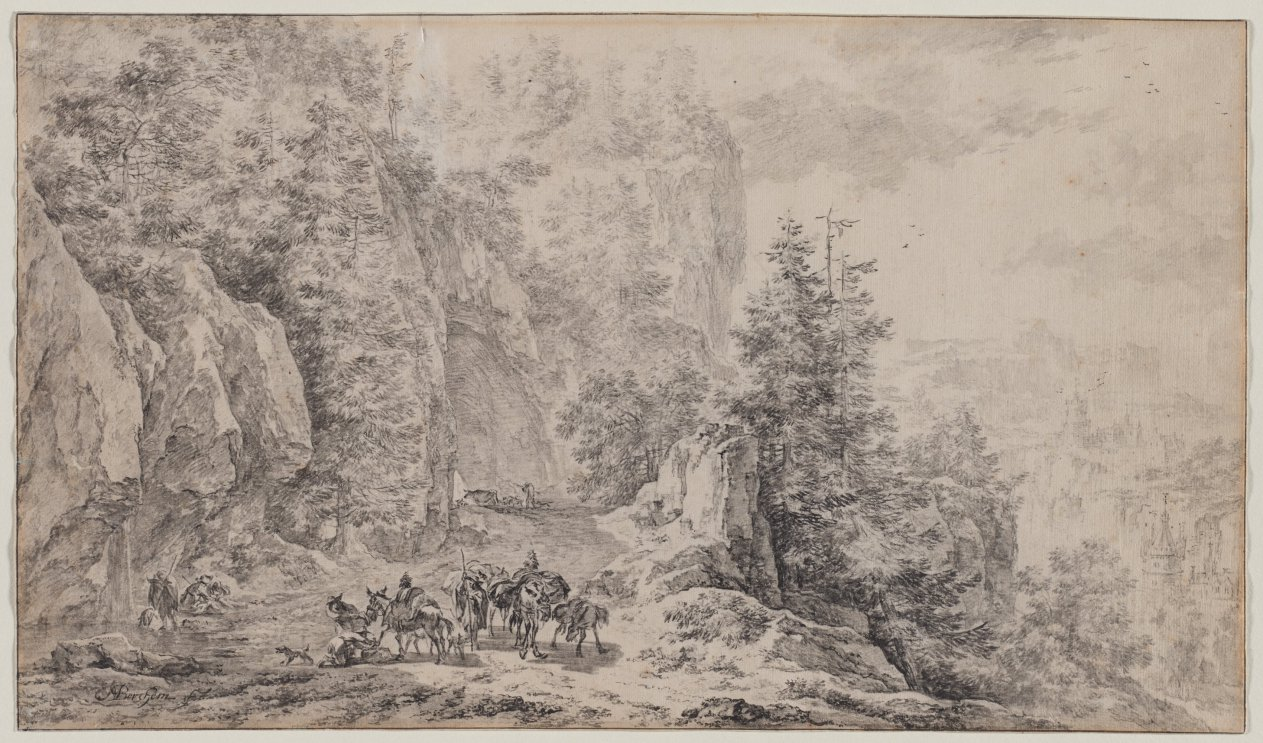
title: Mountainous Landscape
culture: Netherlands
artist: Nicolaes Berchem (Dutch, 1620–1683)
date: c. 1680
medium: brush and black ink, brush and gray wash, and black chalk; framing lines in black and brown ink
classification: Drawing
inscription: signed, lower left, in black ink: NBerchem [N and B in ligature] f. ; VERSO, center, in graphite: 1090 [circled] / 3 1/2 Lat / 1 5/8 2432 104 75 / - ; lower left, in graphite: [illegible, erased] ; lower left, in graphite(?): Berghem ; lower left, in graphite: Nº 555.